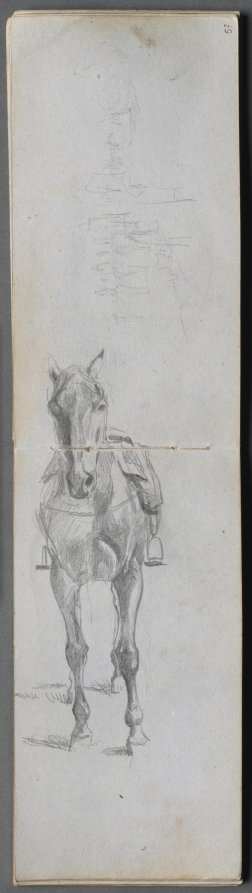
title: Sketchbook, page 56 & 57: Study of a Horse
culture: France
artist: Ernest Meissonier (French, 1815–1891)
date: c. 1860s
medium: graphite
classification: Bound Volume